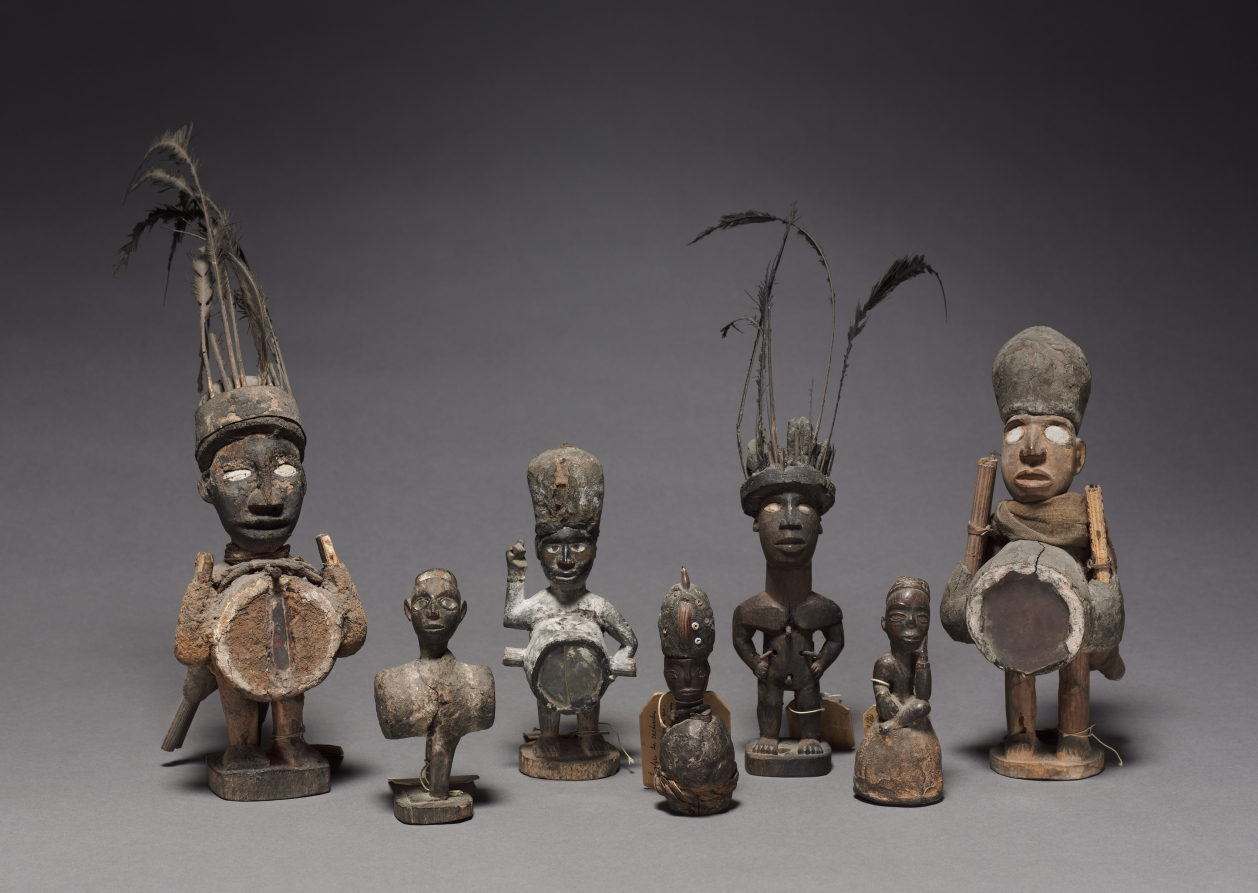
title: Power figure (nkisi)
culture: Africa, Central Africa, Republic of the Congo, Kongo-style maker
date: late 1800s–early 1900s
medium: Wood, feathers, organic material (including resin), iron, and possibly porcelain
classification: Sculpture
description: This figure had lost its nkisi load on the belly, but now shows how the mixture of earth, resin, leaves, glass, and other items was fixed onto the wooden figure, supported by four nails. It had been the property of “the sorcerer of Mboukou.”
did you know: This niksi figurine shows how the mixture of earth, resin, leaves, glass, and other items was fixed. It had been the property of “the sorcerer of Mboukou.”